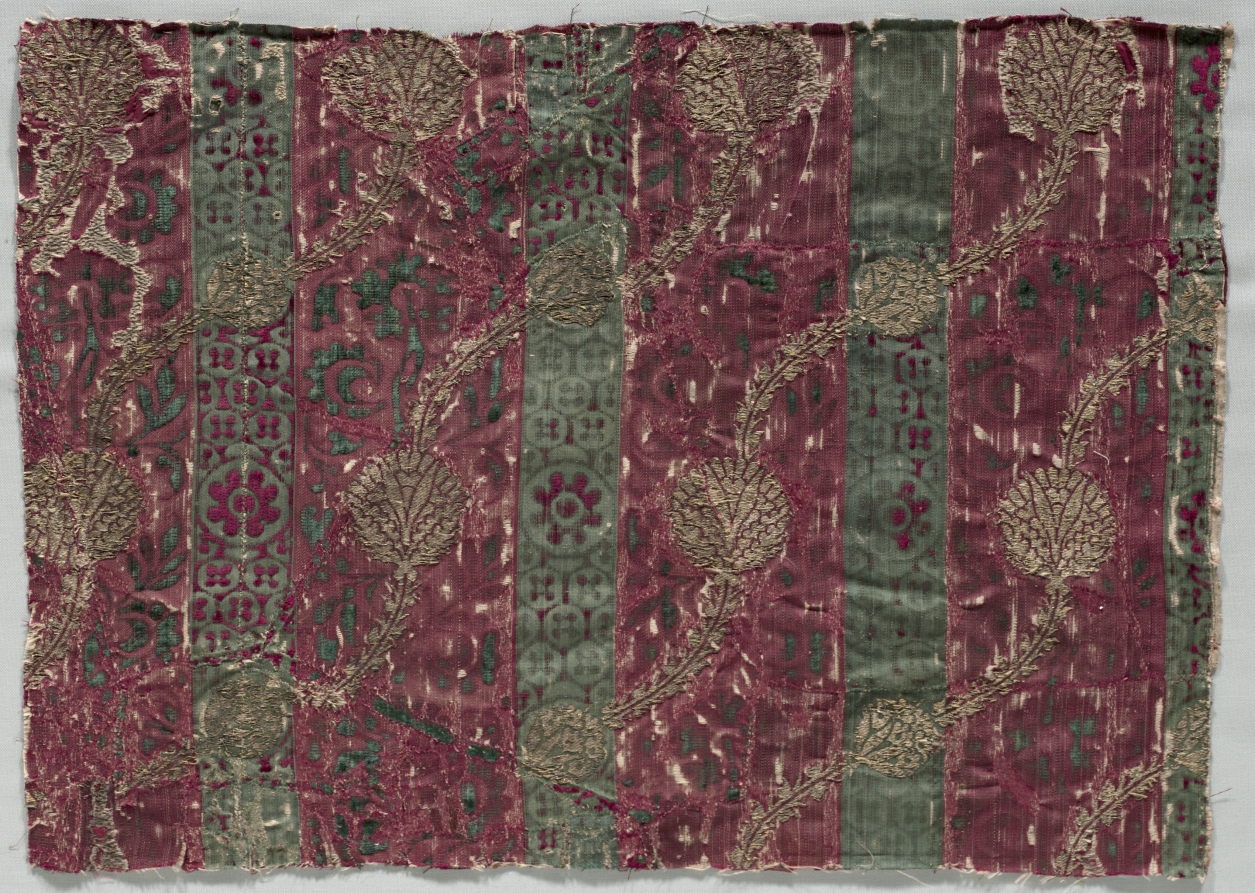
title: Velvet Fragment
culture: Italy, Lucca or Venice ?, first half 15th century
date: 1400–1450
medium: velvet (cut, voided, brocaded); silk and metal thread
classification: Velvet